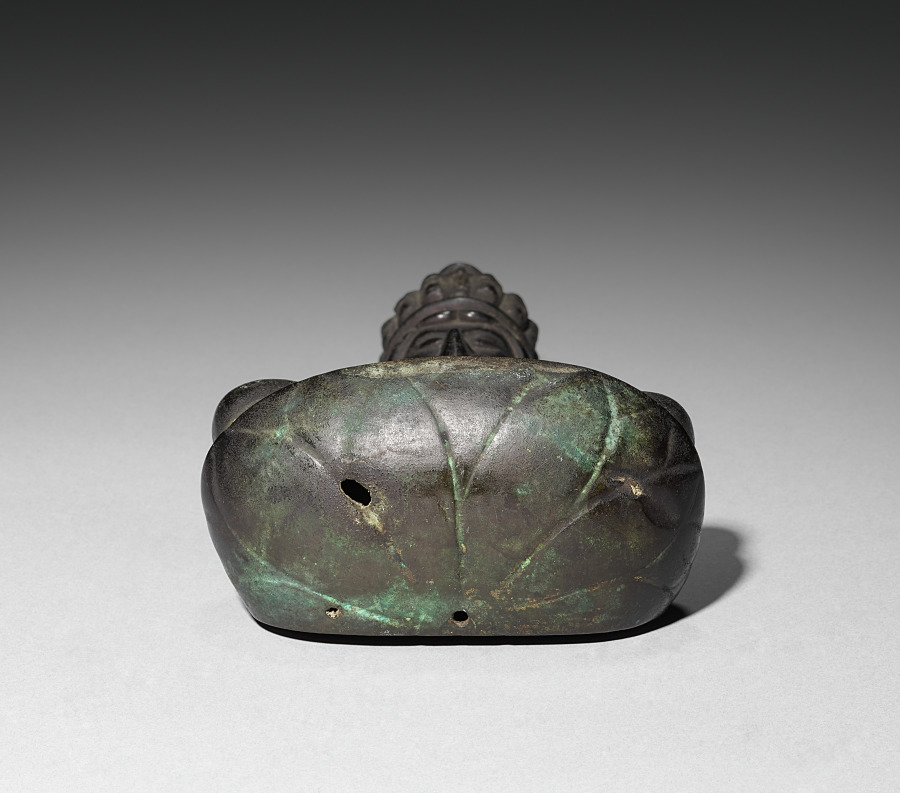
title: Eleven-Headed Kannon (Jūichimen Kannon)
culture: Japan, Heian period (794–1185) to Kamakura period (1185–1333)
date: 1100s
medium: bronze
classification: Sculpture